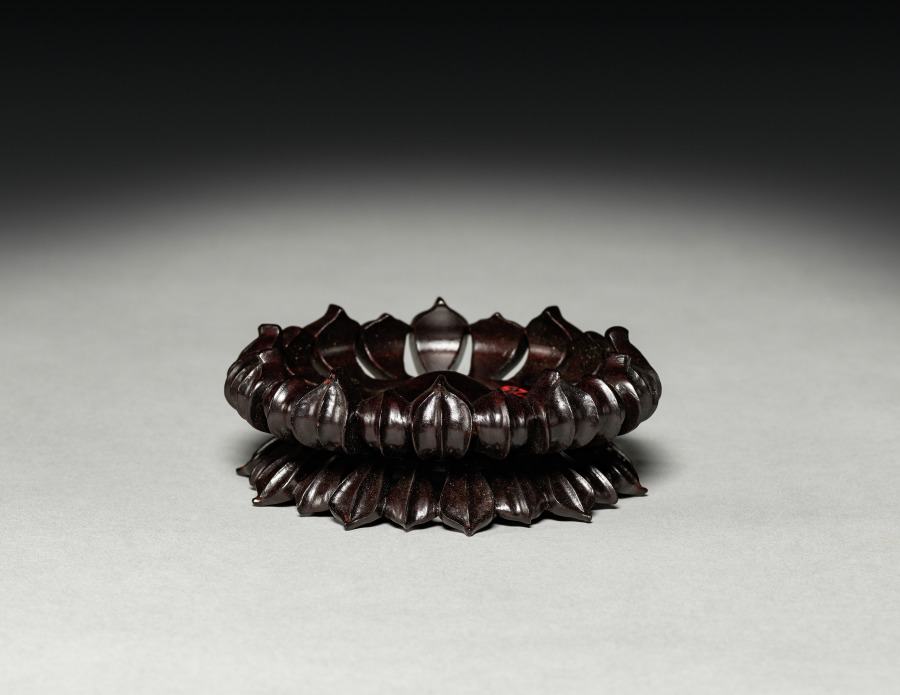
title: Stand for a Covered Box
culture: China, Hebei province, Quyang, Northern Song dynasty (960-1127) to Jin dynasty (1115-1234)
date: 1100s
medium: cream-glazed porcelain with incised decoration, Ding ware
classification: Ceramic